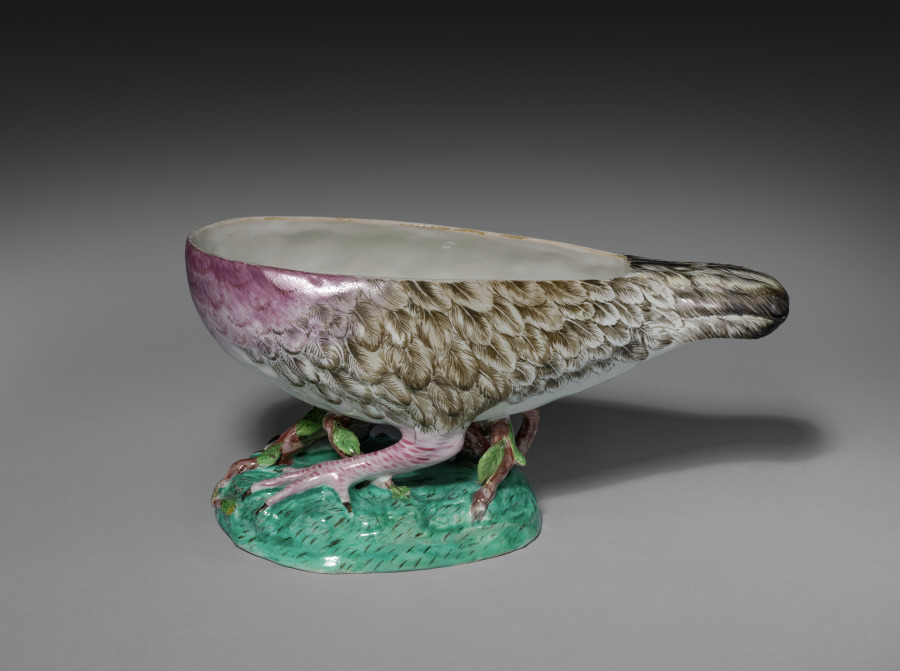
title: Tureen in the Form of a Pigeon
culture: France, 18th century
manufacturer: Sceaux Factory (French, active 1748–66)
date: c. 1760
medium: Tin- glazed earthenware (faience) wth enamel decoration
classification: Ceramic